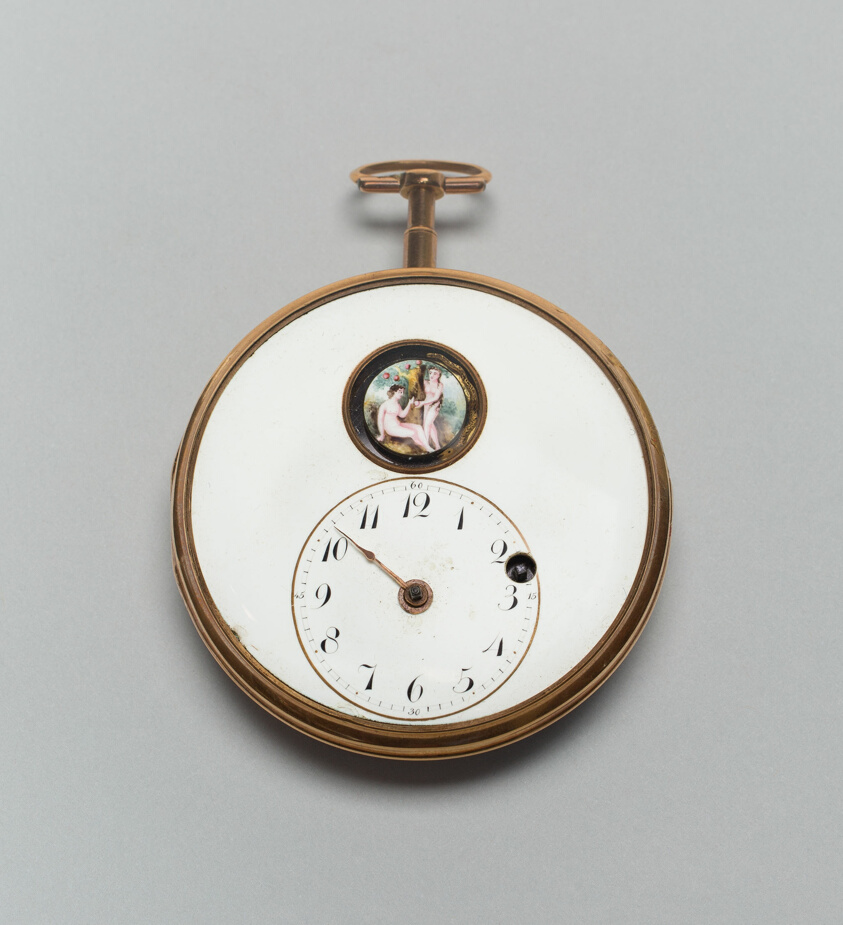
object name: Metalwork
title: Watch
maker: England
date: Late 18th century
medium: Gold and enamels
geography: England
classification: gold; metal; watch; european decorative arts; metalwork